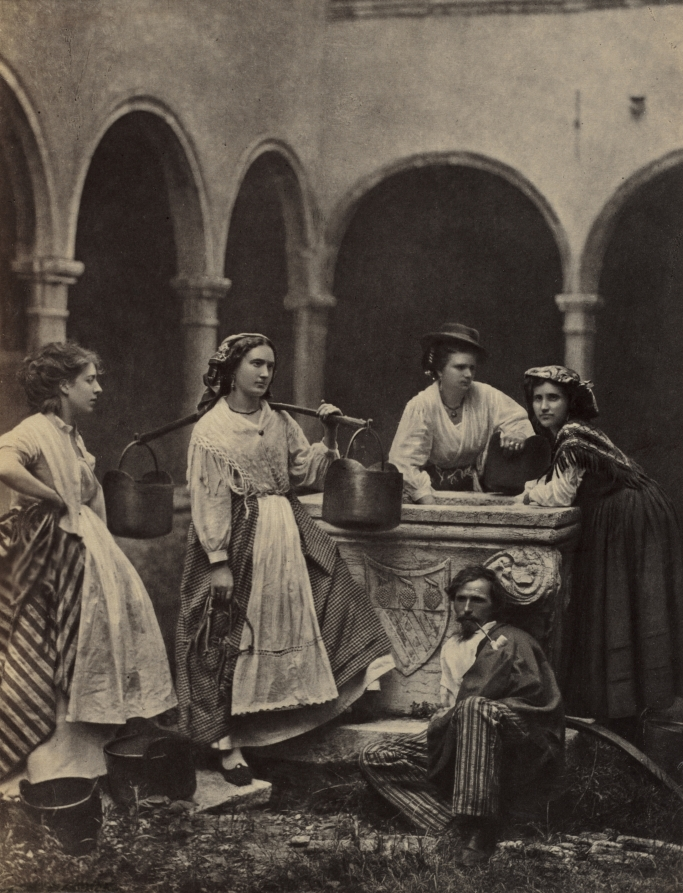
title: Untitled (Genre scene with four women and a man)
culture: France, 19th century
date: late 1800s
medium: albumen print from wet collodion negative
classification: Photograph